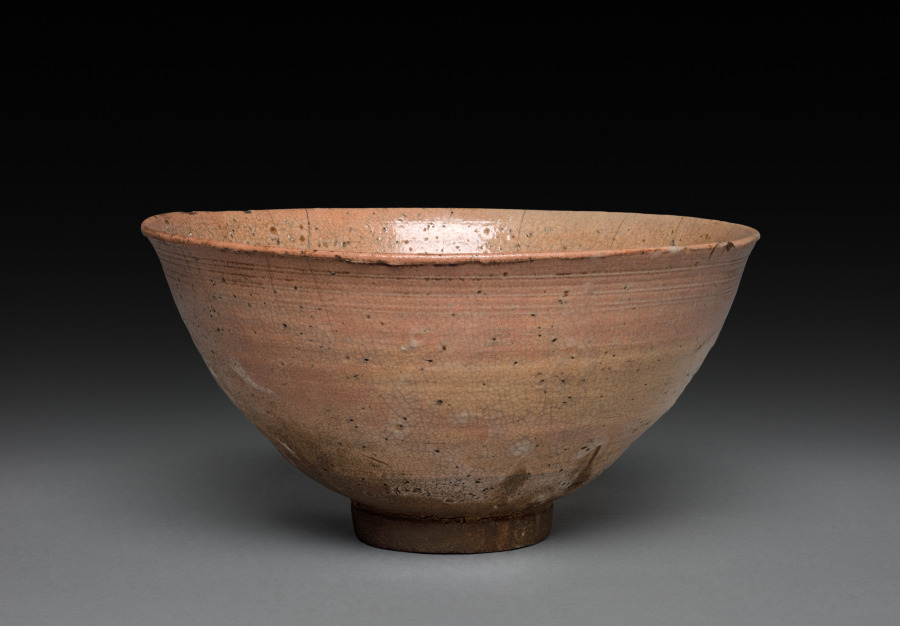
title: Tea Bowl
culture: Japan, Momoyama period (1573–1615)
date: c. 1600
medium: Glazed stoneware (Karatsu ware)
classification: Ceramic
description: Wide-mouthed bowls were used for consuming whipped tea such as that imbibed during the tea ceremony. Karatsu ware like this was among the most prized of such tea bowls. The port city of Karatsu in Saga prefecture in Kyushu was known for its kilns that produced high-fired, Korean-style glazed pottery. The Japanese ruler Toyotomi Hideyoshi invaded Korea in 1592 and 1597, returning with families of Korean potters as spoils of war. This region was one of the sites where these potters were resettled.